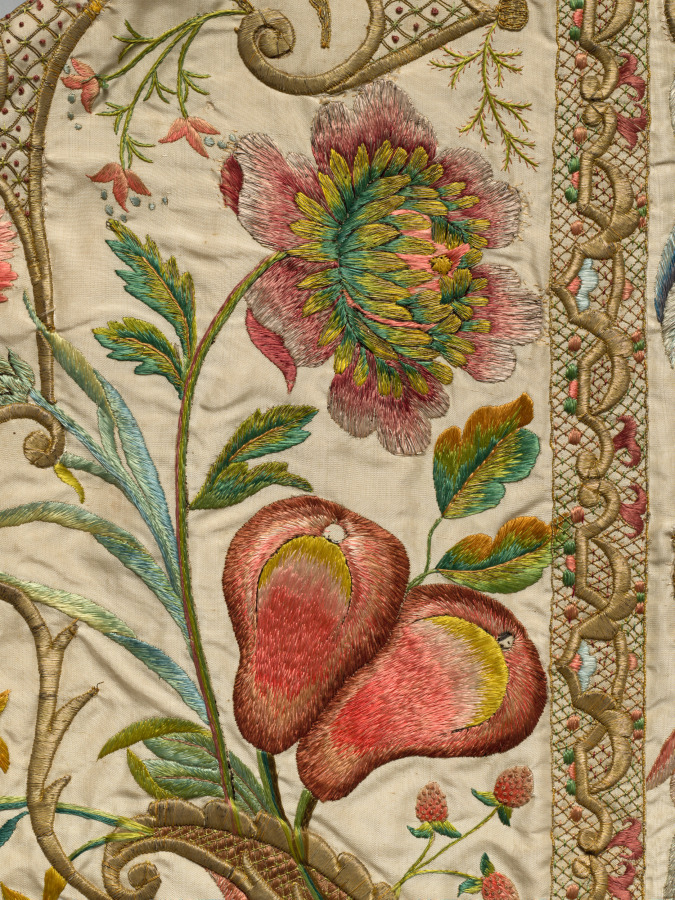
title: Chasuble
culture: Italy or Spain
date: 1700s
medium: Silk and metallic threads: embroidery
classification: Embroidery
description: The chasuble’s exquisite symmetrical decoration highlights its central panel where three illusionary gold containers hold skillfully shaded fruit in pastel silk tones. Delicately curving motifs enhance the side panels along with finely stitched strawberries in so-called French knots. This liturgical chasuble and other vestments, worn over a white alb with lace, were embroidered by professional specialists, such as experts who shaded colored silks or secured gold thread, in early versions of assembly lines that were usually in secular workrooms or in convents. The church or commissioner supplied the raw materials and paid a fee for the work.